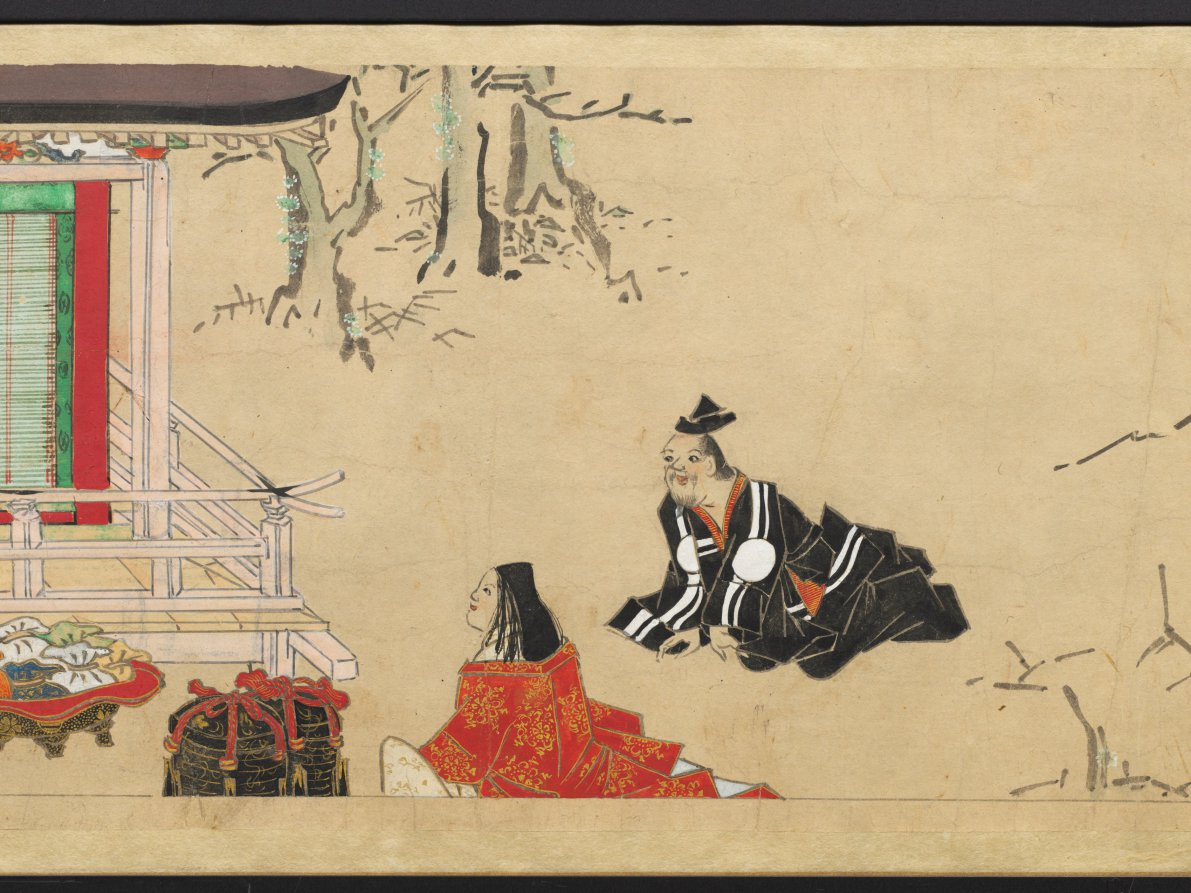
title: The Saltmaker's Story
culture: Japan, Edo period (1615–1868)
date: early 1600s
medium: One of a pair of handscrolls; ink, color, and gold on paper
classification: Painting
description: Once read and copied by girls at New Year’s celebrations and included in dowries, The Saltmaker’s Story is a rags-to-riches tale in which daughters are gifts from the gods. Despite his simple outlook, the main character progresses from humble roots as an associate at Kashima Shrine to the elite status of grandfather of the emperor through the intervention of the Kashima deity. The Saltmaker’s Story is traditionally presented in a set of three scrolls, but the text of this set has been removed by a previous owner, who remounted the illustrations as a pair. The paintings of this one take us from right to left through the first half of the tale.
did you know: This handscroll originally had texts before its paintings, but the texts were removed.